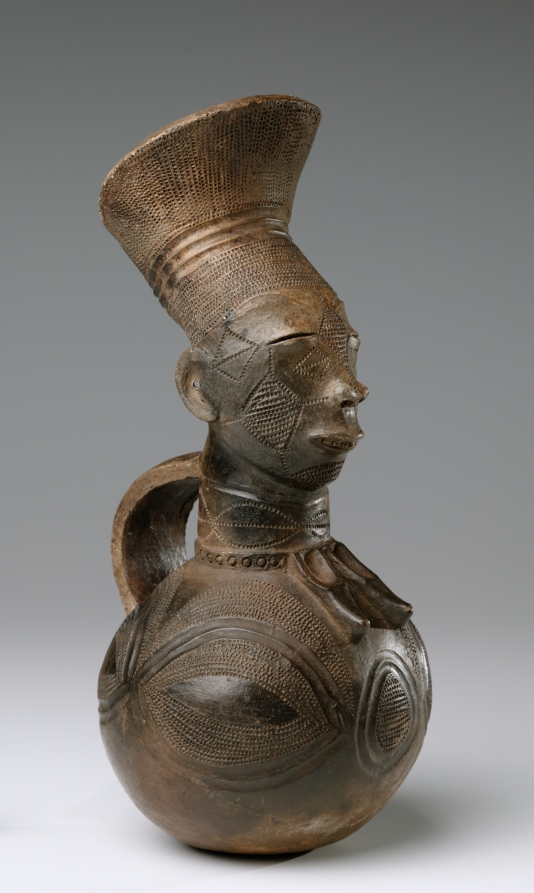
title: Vessel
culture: Central Africa, Democratic Republic of the Congo, Mangbetu, early 20th century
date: early 1900s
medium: terracotta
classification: Vessels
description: Women were and still are responsible for the making of terracotta pots among the Mangbetu. It seems, however, that men added the figurative elements that embellish examples like the one shown here. The depicted head with its elongated skull and halolike coiffure imitates the cranial deformation and hairstyle fashionable among female Mangbetu royalty at the beginning of the 20th century. Typically used for wine, many vessels were also explicitly made for sale to foreigners.